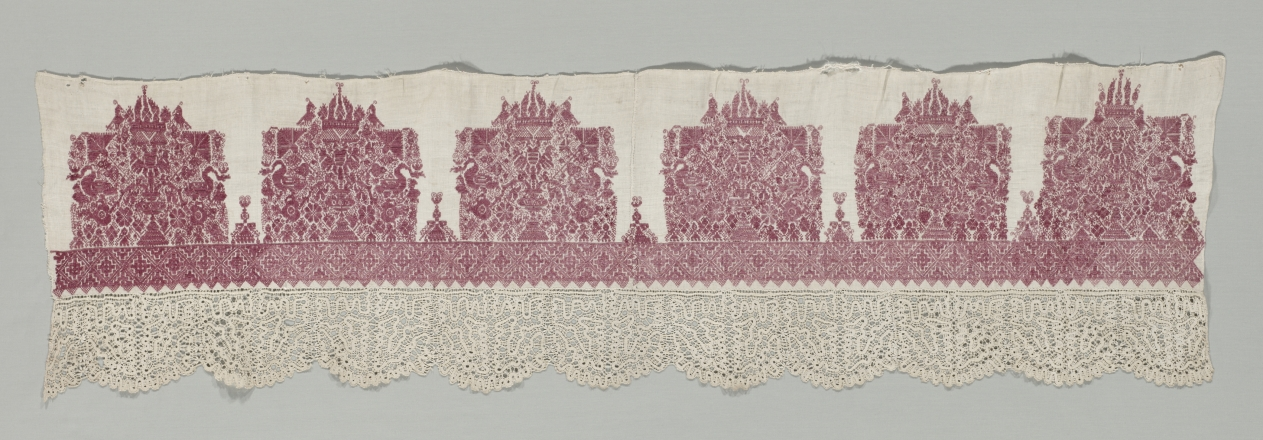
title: Altar Frontal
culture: Italy, 17th-18th century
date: 1600s-1700s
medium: embroidery: linen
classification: Embroidery